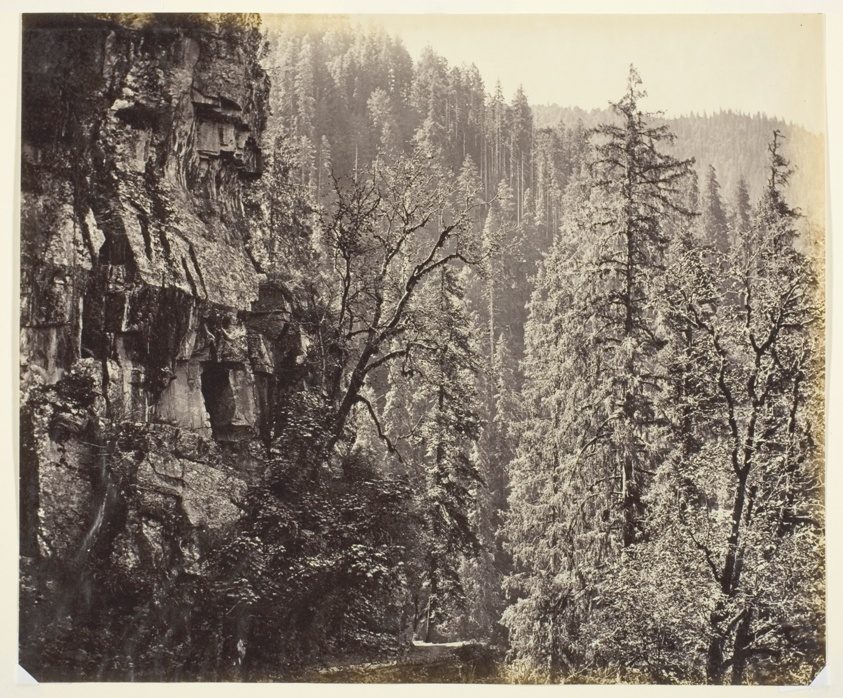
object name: Photograph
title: Untitled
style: 19th century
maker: Samuel Bourne (English, 1834–1912)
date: c. 1865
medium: Albumen print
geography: England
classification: albumen silver print; photographic process; photography; photograph